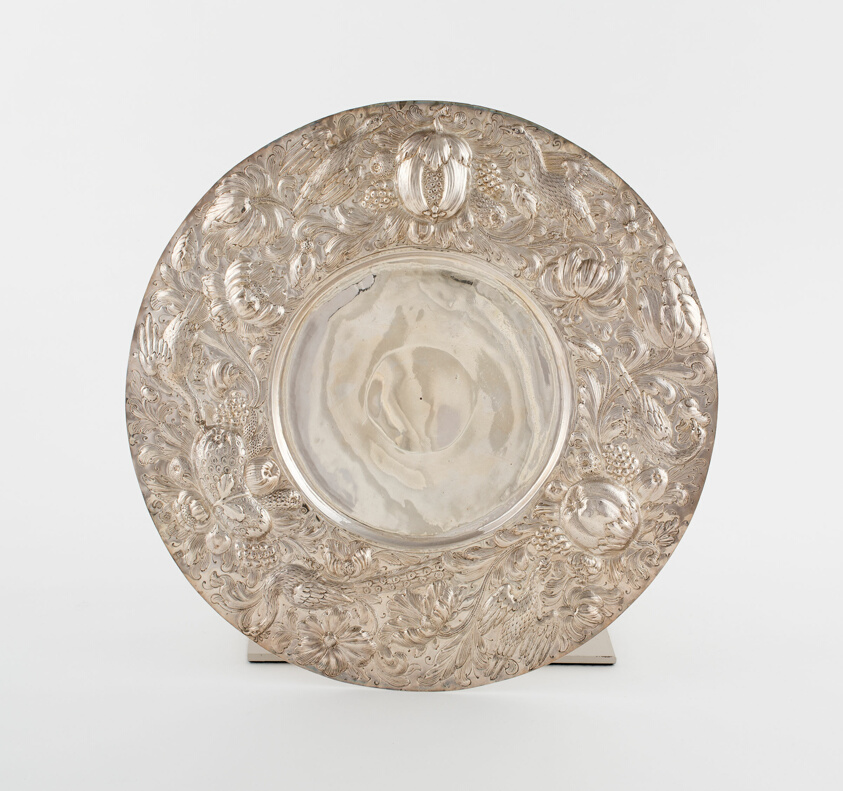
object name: Metalwork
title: Tazza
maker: Possibly by William Hough; English, active after 1641; London, England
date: 1659/60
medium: Silver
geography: London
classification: silver; metalwork; european decorative arts